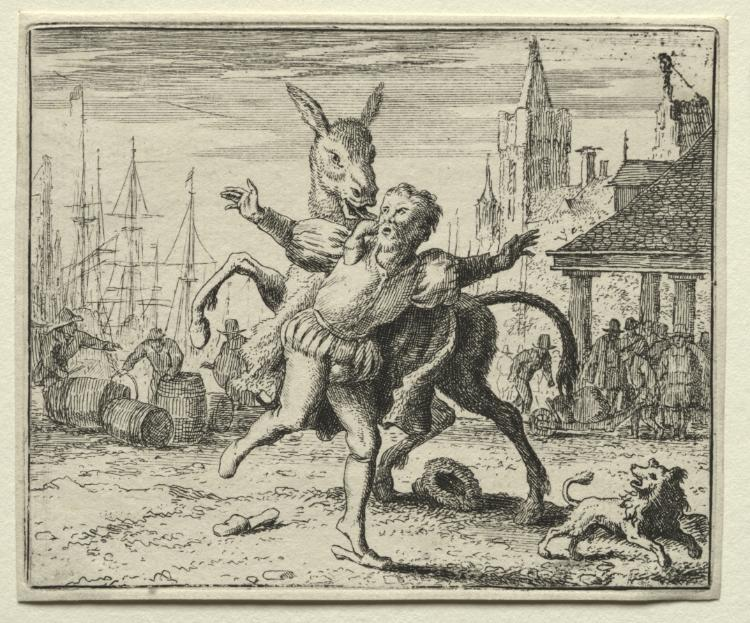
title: Reynard the Fox: The Jealous Ass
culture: Netherlands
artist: Allart van Everdingen (Dutch, 1621–1675)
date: 1650–75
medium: etching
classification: Print